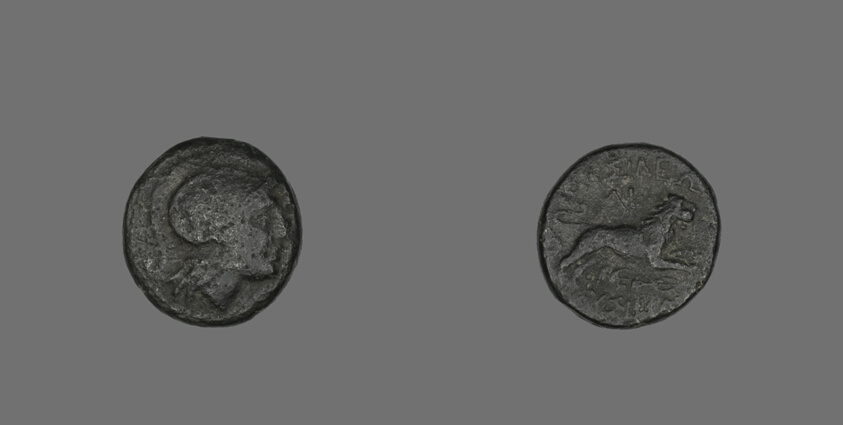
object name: Coin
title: Coin Depicting the Goddess Athena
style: greek, ancient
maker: Greek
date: 306-281 BCE, issued by Lysimachus of Thrace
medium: Bronze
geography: Thrace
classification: coin; ancient art; struck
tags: Athena, lions